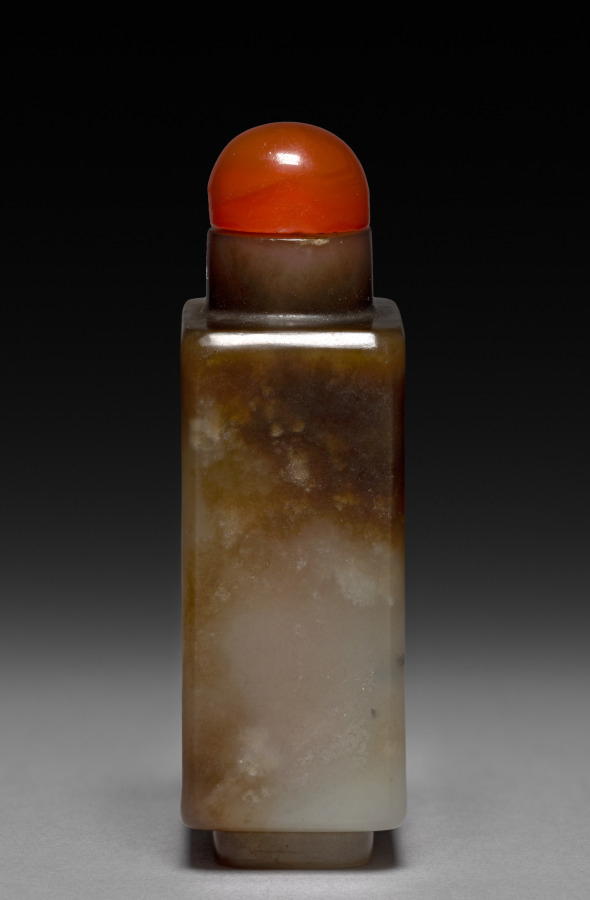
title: Snuff Bottle with Stopper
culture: China, Qing dynasty (1644–1911), Qianlong reign (1736–95)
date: 1736–95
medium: jade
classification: Jade